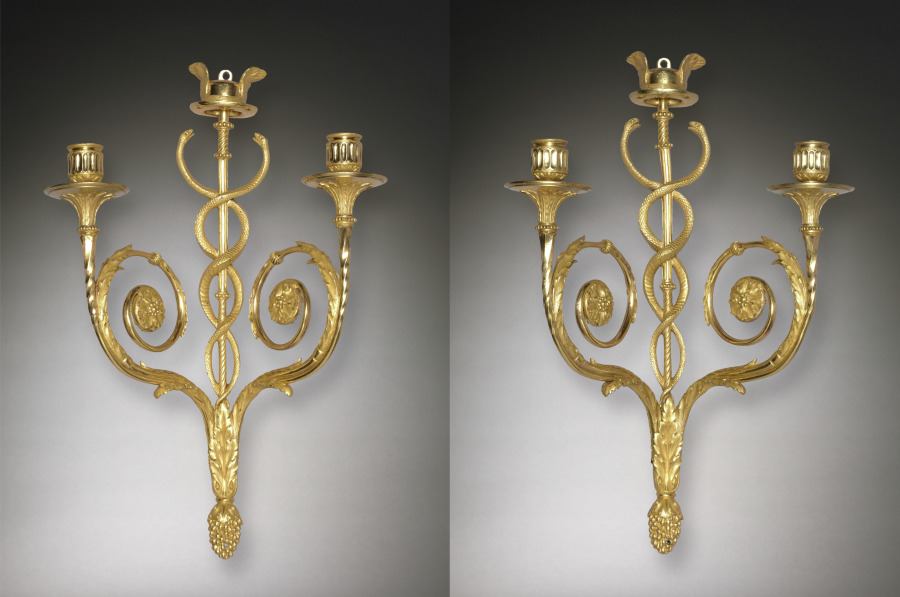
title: Pair of Louis XVI Style Candle Brackets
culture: France, style of Louis XVI, 18th Century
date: c. 1775–1790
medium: gilded bronze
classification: Furniture and woodwork